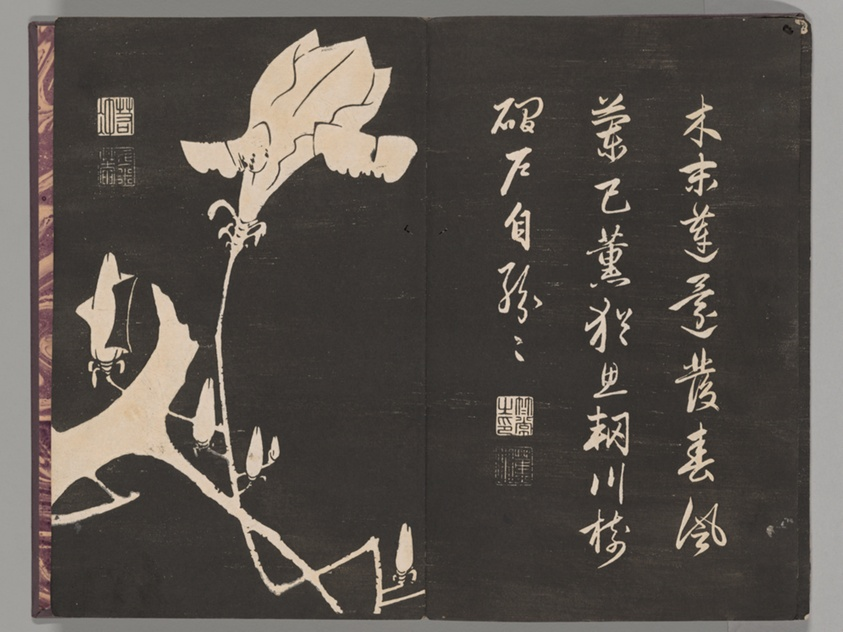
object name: Book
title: Soken sekisatsu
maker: Ito Jakuchu (Japanese, 1716-1800)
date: 1767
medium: Woodblock printed book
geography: Japan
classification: book